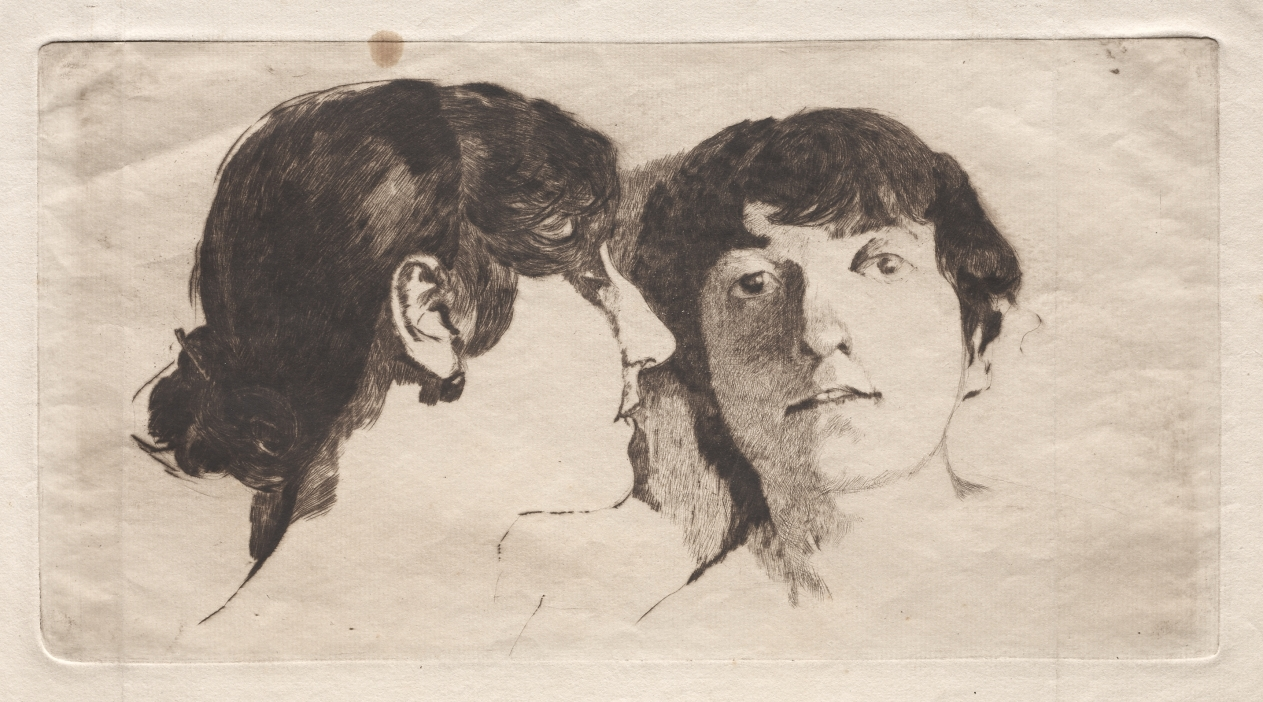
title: Venetian Models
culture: America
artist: Otto H. Bacher (American, 1856–1909)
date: late 19th-early 20th century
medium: drypoint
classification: Print